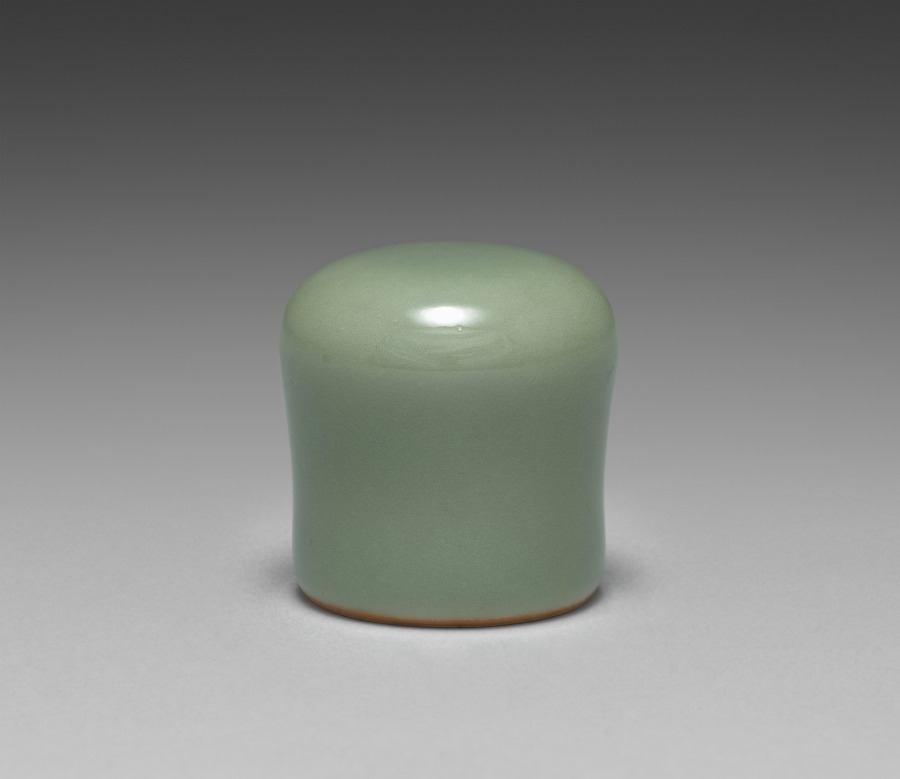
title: Roller End for Hanging Scroll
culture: Japan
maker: Seifū Yohei III (Japanese, 1851–1914)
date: 1893–1914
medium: One of a pair of hanging scroll roller ends; porcelain with celadon glaze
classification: Ceramic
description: Before entering into his apprenticeship with Yohei II, Seifū Yohei III trained as a painter in Osaka. He continued to paint throughout his career as a ceramist. As part of his ceramic practice, Yohei III also made roller ends to be placed at either end of the wooden dowel around which the lower part of a hanging scroll mounting is wrapped. These served both as weights for the painting and as knobs for handling it when rolling and unrolling. The pair here is made of porcelain with a green glaze.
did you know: This is one of two roller ends for the hanging scroll by Seifū Yohei III, Rain Clearing over a Summer’s Mountain, CMA 2022.151.